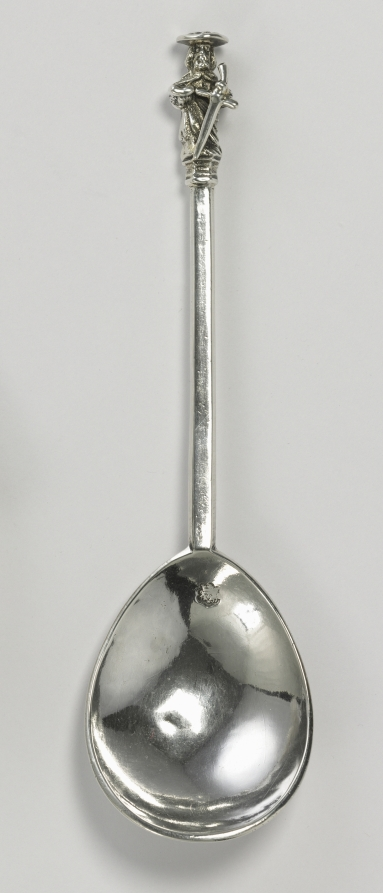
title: Saint Paul Spoon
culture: England, London, 17th century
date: 1622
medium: silver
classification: Silver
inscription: pricked on back of bowl: "R H."